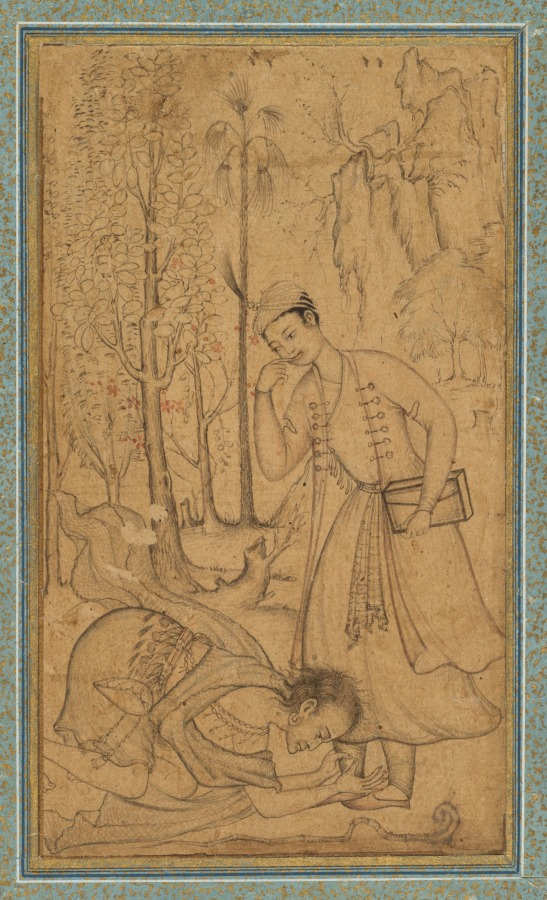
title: A holy man prostrating himself before a learned prince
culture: Mughal India, court of Akbar (reigned 1556–1605)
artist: attributed to Manohar (Indian, active late 1500s)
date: c. 1585; border added probably 1700s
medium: ink on paper, laid down with borders of gold-decorated blue paper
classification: Painting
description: Manohar riffs on the work of his father, Basavana, by showing a holy man bowing at the feet of a prince, instead of another holy man. Those who could recognize the relationship between this work and that of his father (CMA 2013.296) would impress gatherings of courtly connoisseurs, who prided themselves on being able to identify the hand of individual artists just by looking at the paintings. Recitation of poetry would accompany the viewing of paintings and drawings. Virtuoso artists reflected glory on their patrons. As an Islamic ruler, Akbar and his court participated in these activities—a new purpose for art that Indian artists had to learn.